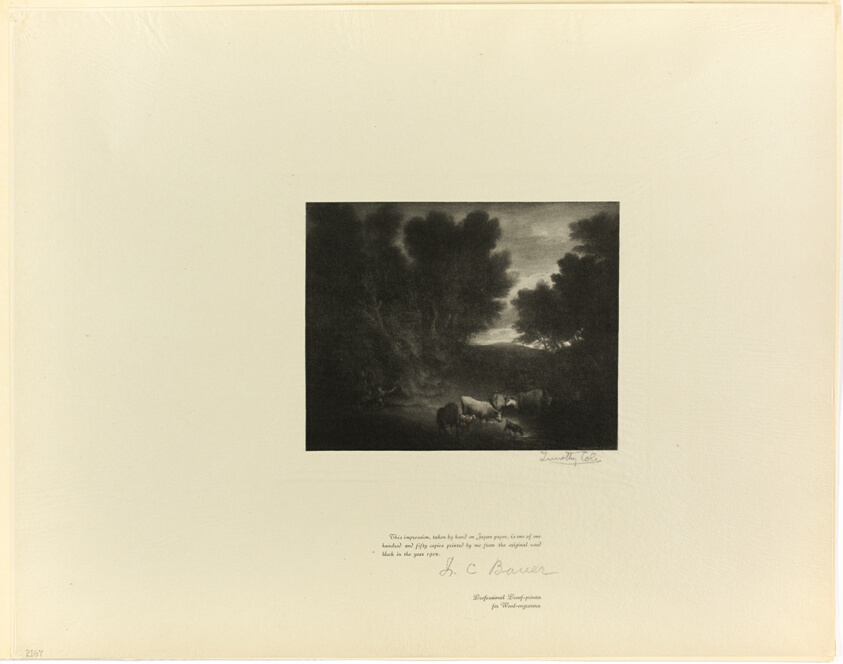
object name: Print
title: The Watering Place, from Old English Masters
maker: Timothy Cole (American, born England, 1852-1931); after Thomas Gainsborough (English, 1727-1788)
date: 1897, printed 1902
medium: Wood engraving on chine paper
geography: United States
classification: wood engraving; print; prints and drawing